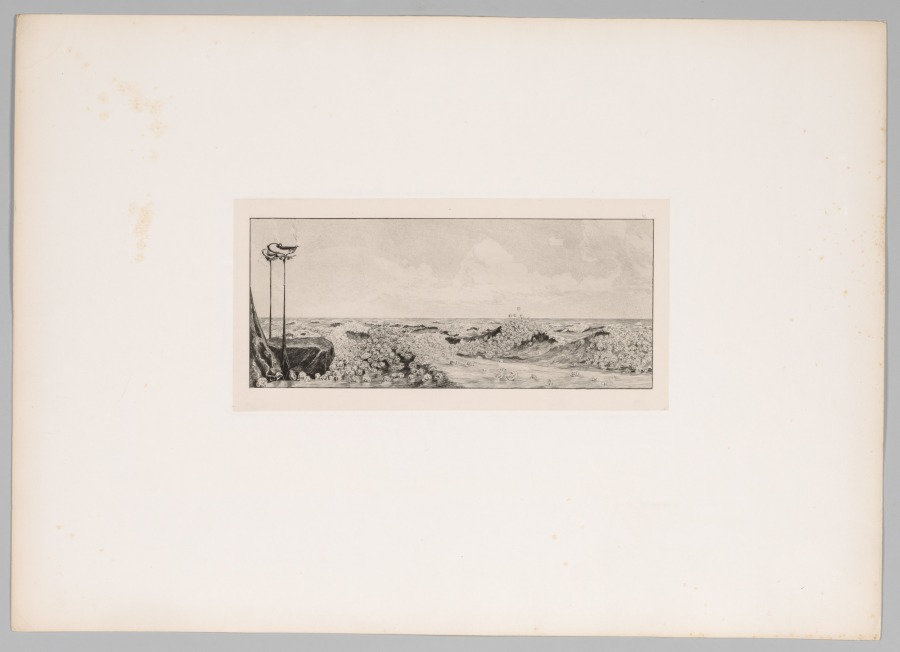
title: A Glove: Homage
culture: Germany, 19th century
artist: Max Klinger (German, 1857–1920)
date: 1880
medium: etching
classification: Print